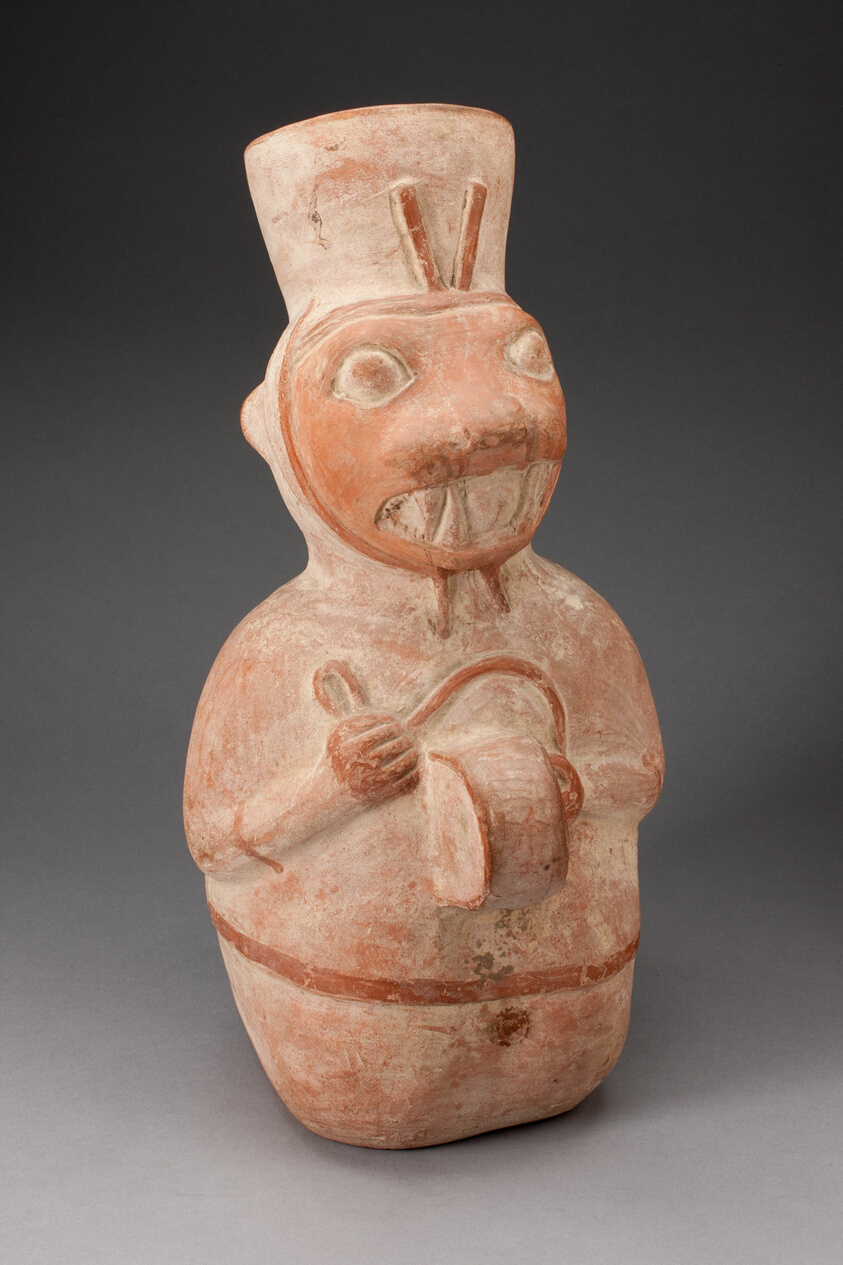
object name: Vessel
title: Jar in the Form of an Anthropomorphic Seal Playing a Drum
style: moche, south american, andes, Arts of the Americas, andean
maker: Moche (North coast, Peru)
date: 100 BCE–500 CE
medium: Ceramic and pigment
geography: Peruvian North Coast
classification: earthenware; ceramics; vessel; art of the americas